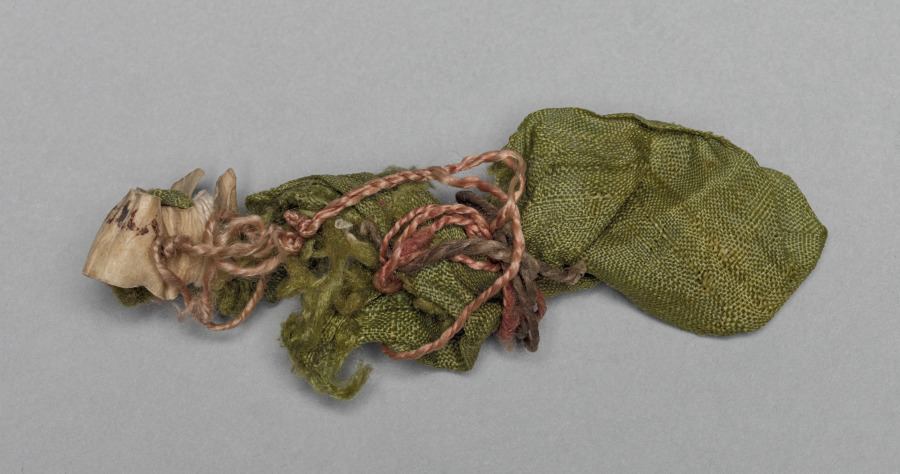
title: Relic of St. Marcian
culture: Germany, Lower Saxony?, Romanesque period, 11th century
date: c. 1045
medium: Plain weave green silk with an extant selvage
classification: Metalwork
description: This relic is in the portable altar that was commissioned by Countess Gertrude of Brunswick, one of the Guelph Treasure’s earliest and most sumptuous objects.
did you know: X-rays revealed no solid material is wrapped in this piece of cloth.